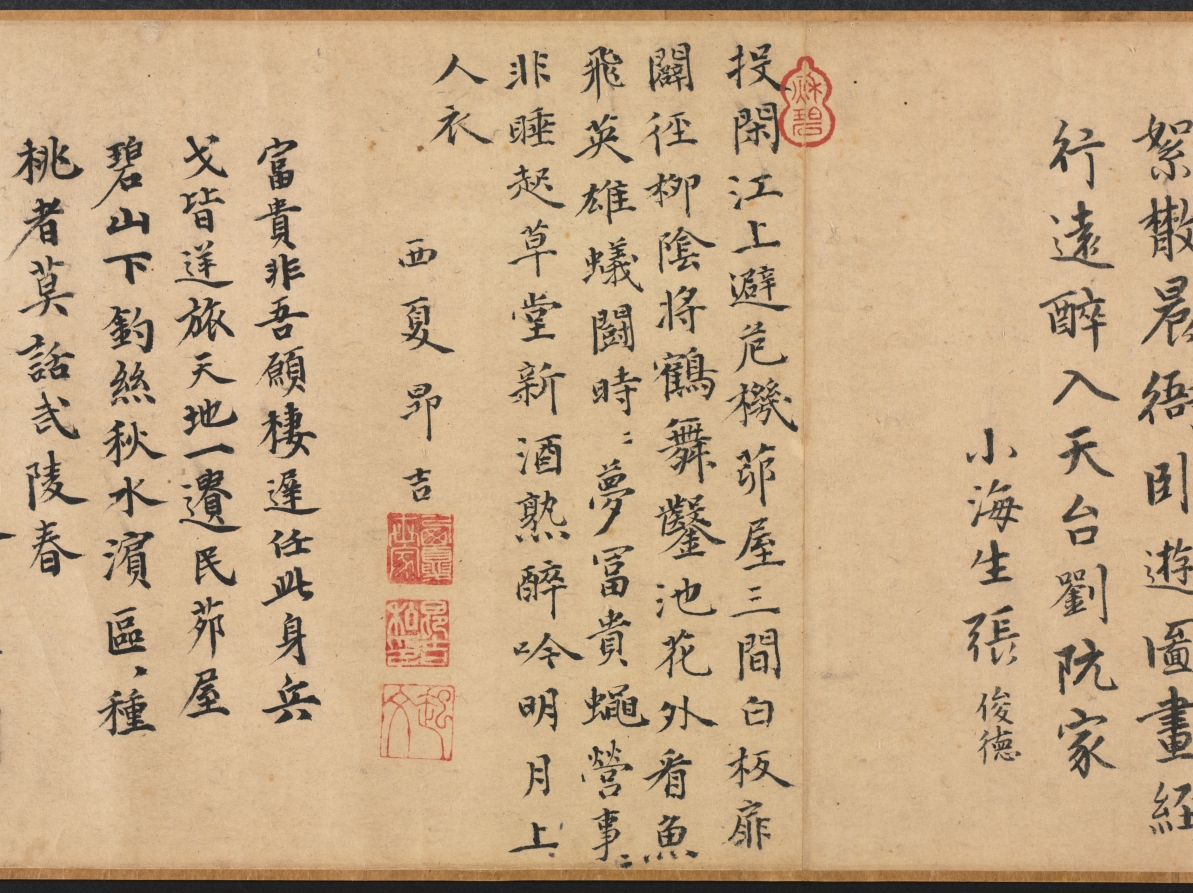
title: Leisure Enough to Spare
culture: China, Yuan dynasty (1271-1368)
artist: Yao Tingmei (Chinese, active mid-1300s)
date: 1360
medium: handscroll, ink on paper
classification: Painting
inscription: 至正廿年春正月_日作此併系鄙語于尾 地偏人遠閉柴關，滿院松陰白晝閒。 眼底風塵渾忘却，坐看流水臥看山。 吳興姚廷美畫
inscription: 23 colophons and 53 seals (dates unavailable for some): 1 colophon, dated 1360, and 2 seals of Yang Weizhen (1296-1370); 1 colophon and 3 seals of Wan Yi; 1 colophon of Zhang Junde; 1 colophon and 3 seals of Angji (act. ca. mid-14th c.); 1 colophon and 1 seal of Xu Shiquan; 1 colophon and 3 seals of Gao Yu; 1 colophon and 2 seals of Li Mingfu; 1 colophon and 2 seals of Lu Lin; 1 colophon and 1 seal of Zhang Qian; 1 colophon of Tao Tangwen; 1 colophon and 1 seal of Wu Yuangui (act. ca. 1300-60); 1 colophon of Bao Jiong; 1 colophon of Wang Zao; 1 colophon and 1 seal of Ma Chuyi; 1 colophon and 1 seal of Lin Yizhuang; 1 colophon and 1 seal of Gu Shunju; 1 colophon and 2 seals of Wang Jing; 1 colophon and 2 seals of Lin Shouchang; 1 colophon and 1 seal of Gao Zhidao; 1 colophon of Lin Xun; 1 colophon, dated 1359, and 2 seals of Meng Weicheng (act. mid-14th c.); 1 colophon and 1 seal of Meng Zhiji (act. mid-l4th c.); 14 seals of Liang Qingbiao 梁清標 (1620-1691); 1 poem dated 1755 and 5 seals of the Qianlong 乾隆 emperor (r. 1736-95); 2 seals of the Jiaqing 嘉慶 emperor (r. 1796-1821); 3 seals of the Xuantong 宣統 emperor (r. 1909-11).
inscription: Title on frontispiece by Zhang Bi 章弼: Signed Gongchen 拱辰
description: Seclusion and leisure—the ideals of the literati, or scholar-gentlemen—are expressed in this mature work by Yao Tingmei. The theme acquired special meaning at a time of the military uprisings near the end of the Yuan dynasty. Dedicated to an ascetic named Du, this work combines painting, calligraphy, and poetry; following the painting are more than 20 poems and essays written by notable scholars, one of whom was the calligrapher Yang Weizhen. It reveals not only the aesthetic taste of the literati but also the practice of contributing artistic and literary works to fulfill social obligations. Yao's painting demonstrates his individual style derived from various ancient masters (Guo Xi, Dong Yuan, and Juran). Yang Weizhen's calligraphy exhibits his bold, vigorous style and his intent to capture the spirit of antiquity in art.